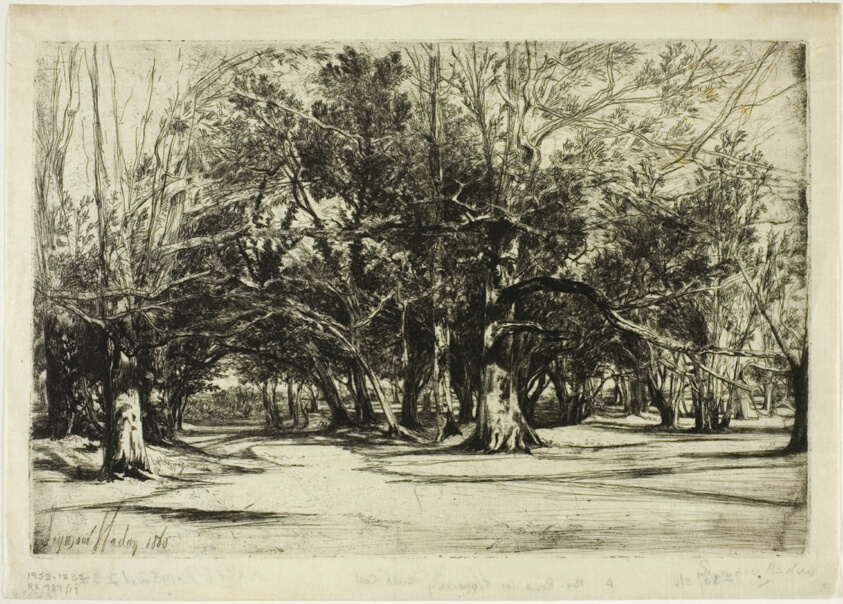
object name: Print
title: A By-Road in Tipperary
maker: Francis Seymour Haden (English, 1818-1910)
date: 1860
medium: Etching and drypoint on ivory Japanese paper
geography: England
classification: etching; print; prints and drawing